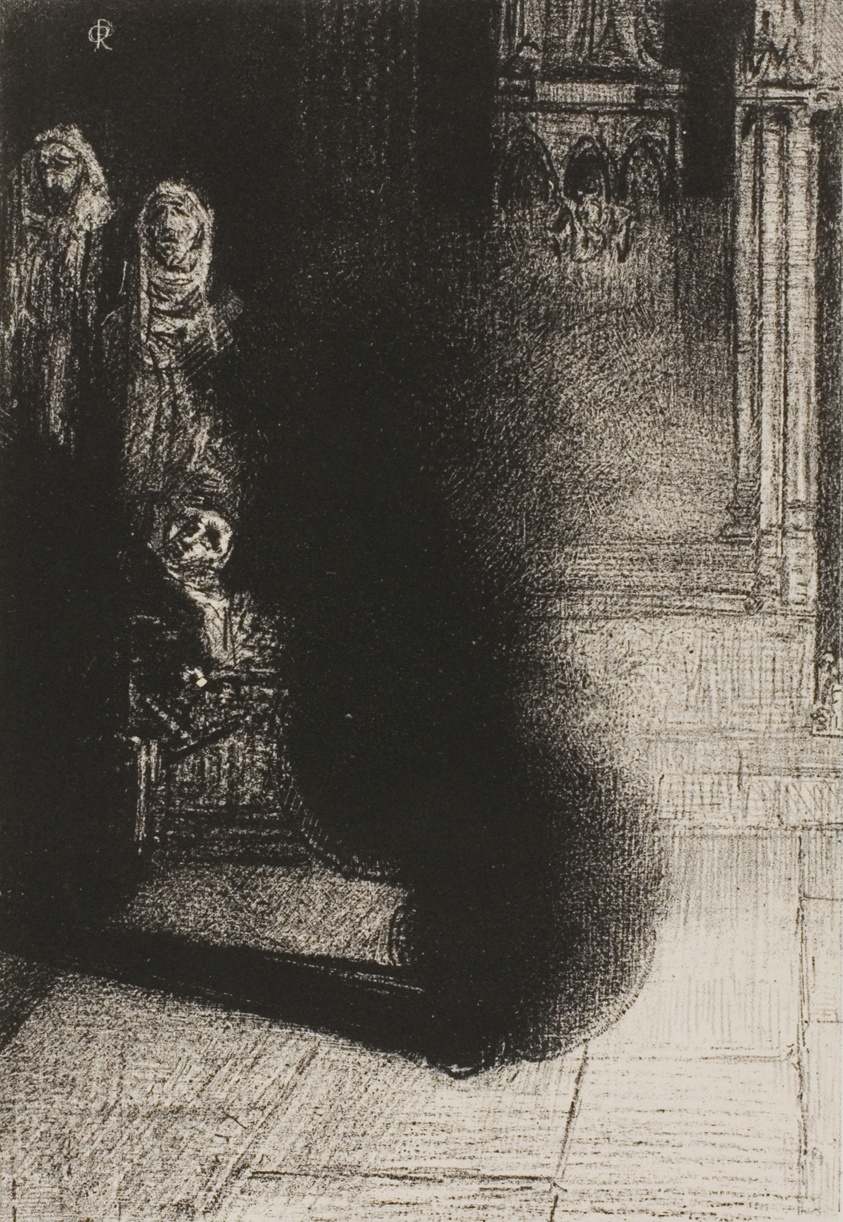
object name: Print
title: Frontispiece for Les Flambeaux noirs by Emile Verhaeren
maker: Odilon Redon (French, 1840-1916)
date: 1890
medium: Lithograph in black on ivory China paper laid down on white wove paper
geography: France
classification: lithograph; print; prints and drawing; paper